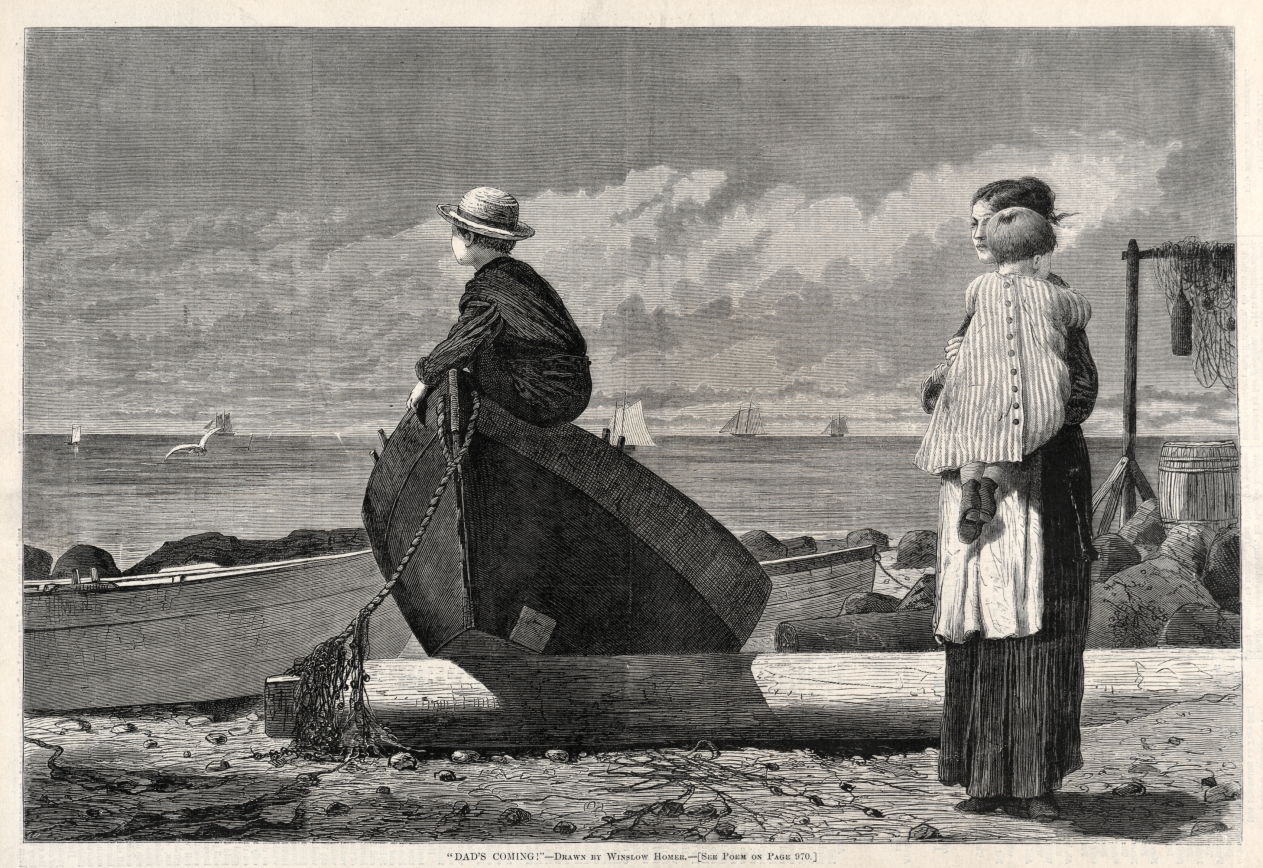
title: "Dad's Coming!"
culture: America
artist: Winslow Homer (American, 1836–1910)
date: 1873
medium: wood engraving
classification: Print